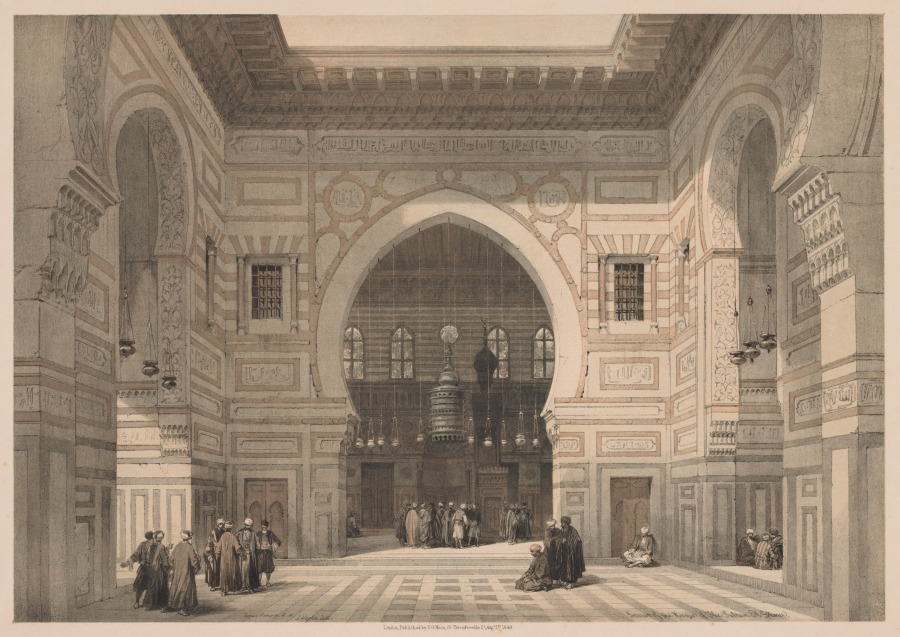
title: Egypt and Nubia: Volume III - No. 36, Interior of the Mosque of the Sultan El Ghoree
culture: England, 19th century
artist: Louis Haghe (British, 1806–1885)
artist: after David Roberts (Scottish, 1796–1864)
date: 1838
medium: color lithograph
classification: Print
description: The mosque of the Sultan El Ghoree was built by the Mamluk Sultan, Qansuh al-Ghuri (ruled 1501–16) according to sacred proportions. The lavish complex included an elegant fountain, a college, and the sultan’s own mausoleum, which was never used. Today, the mosque is still part of the historic urban fabric of modern Cairo. This print shows a view into its interior. Artist David Roberts travelled in the Middle East and North Africa, particularly Egypt, from 1838 to 1839. During his journey, Roberts produced a great number of sketches. He developed these into watercolors, which were the basis for a series of 247 lithographs made by Louis Haghe, of which this is one.